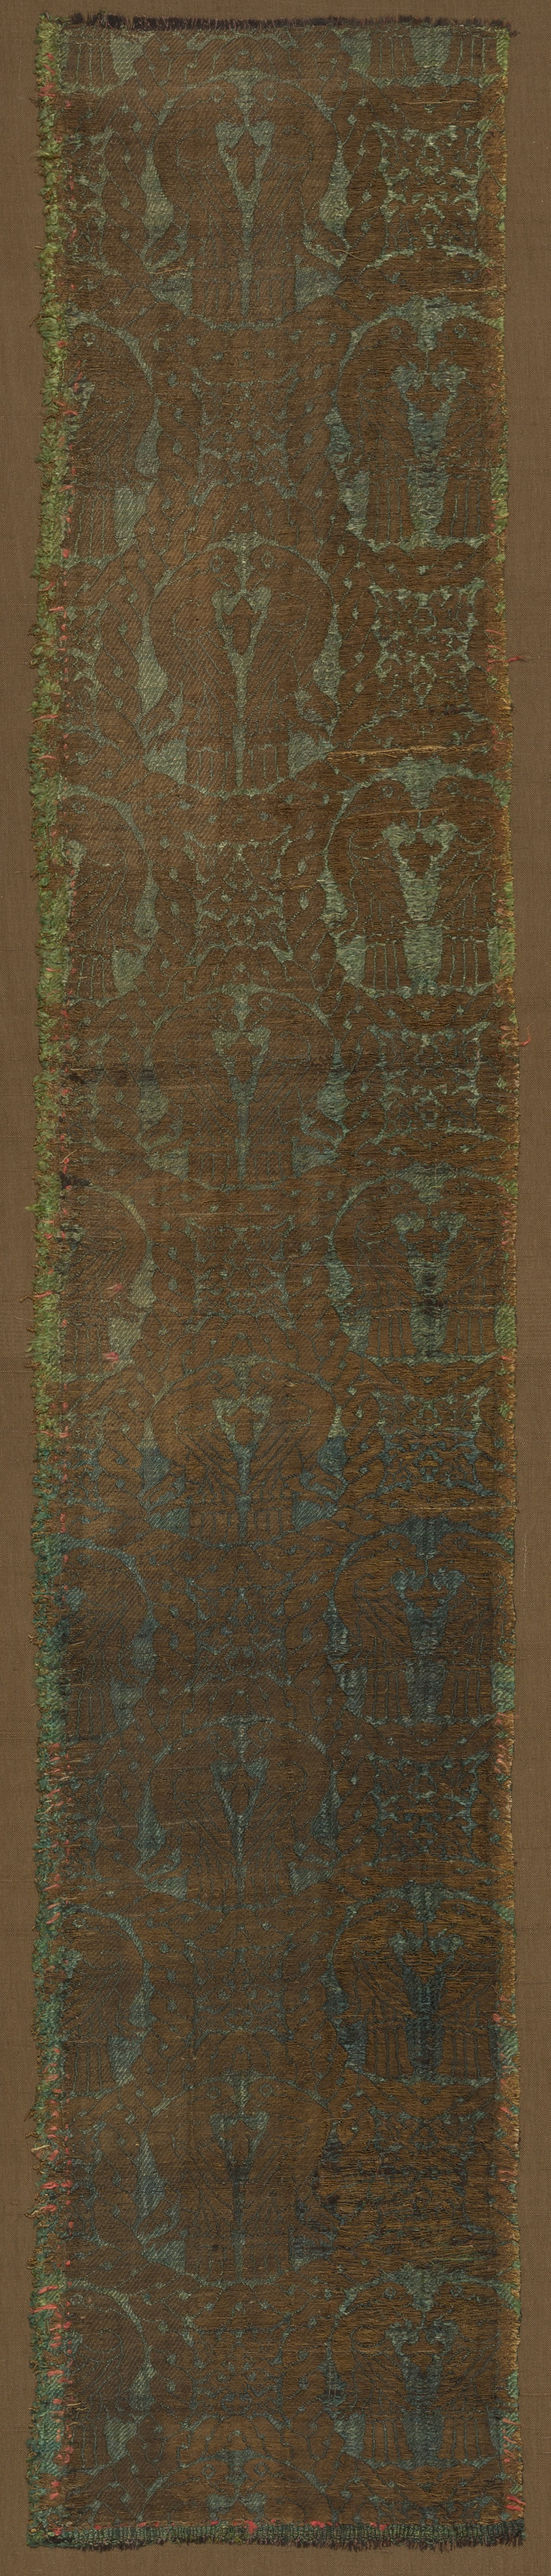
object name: Textile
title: Panel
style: southern song, yüan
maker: Eastern Islamic World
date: 13th century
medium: Silk and gilt-animal-substrate-wrapped silk, two-color complementary weft, weft-float faced 1:4 'Z' twill weave with inner warps (samite)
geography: Central Asia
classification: textile; weaving